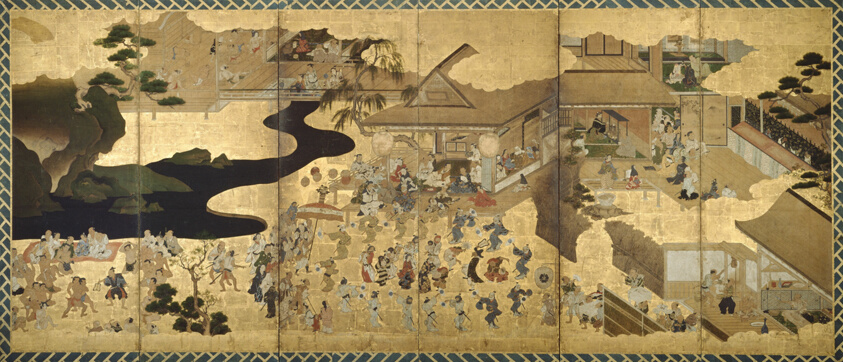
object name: Painting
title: Genre Scenes (Fūzoku byōbu)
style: Japanese (culture or style)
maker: Artist unknown; Japanese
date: About 1640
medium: Six-fold screen; ink, color, gold and silver on paper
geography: Japan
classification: screen; painting; asian art